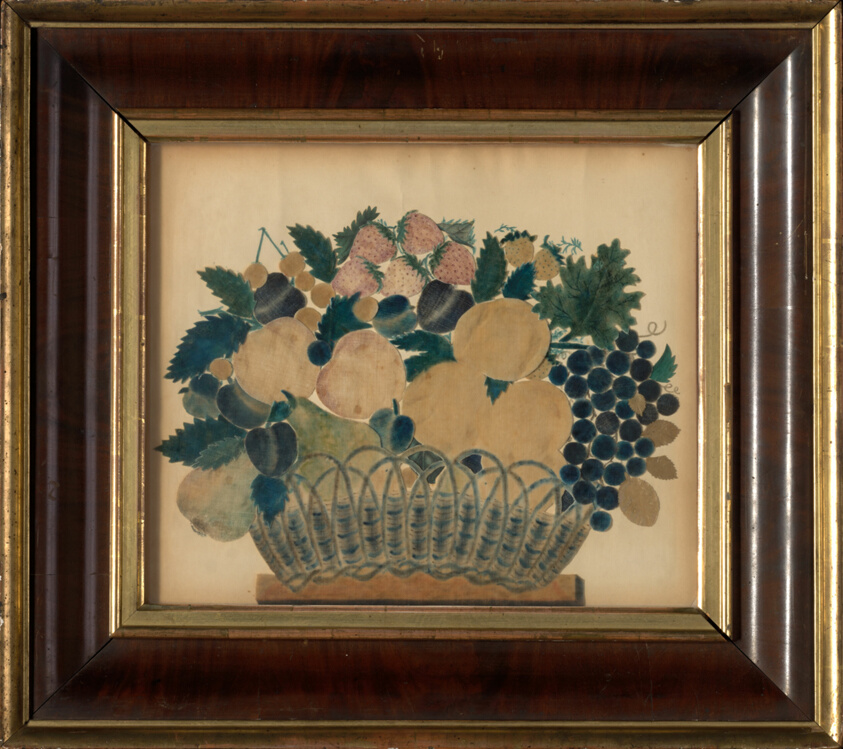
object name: Textile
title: Picture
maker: United States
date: 1810/30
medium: Painted paper; applied stenciled and embossed cotton 'velvet' and paper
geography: United States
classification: textile; weaving - printed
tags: Chicago